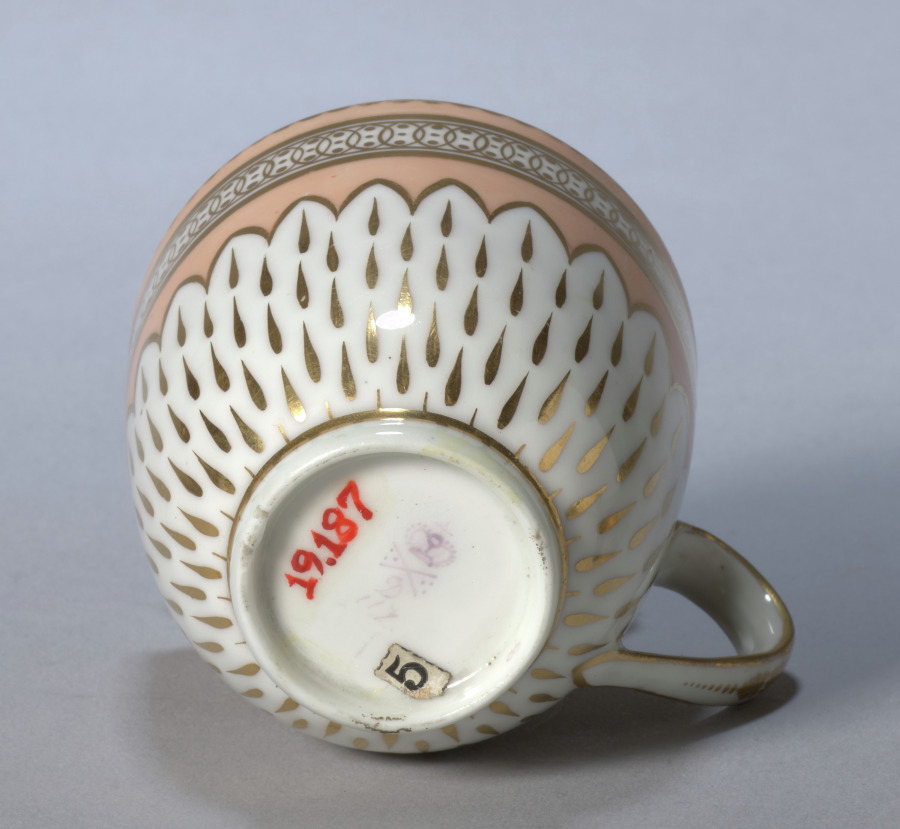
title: Cup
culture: England, Derby, early 19th century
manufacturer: Derby (Crown Derby Period) (British)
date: c. 1800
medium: porcelain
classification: Ceramic